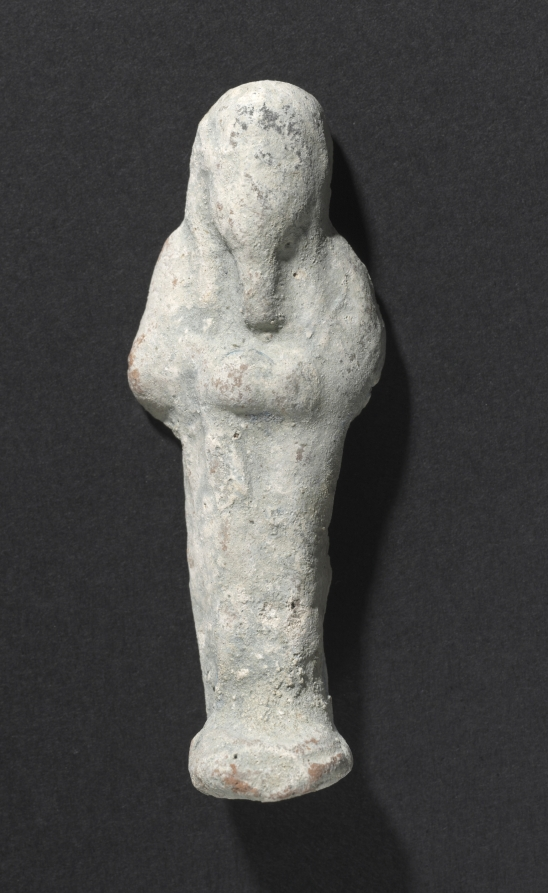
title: Shawabty of Ditamenpaankh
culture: Egypt, Late period (715–332 BCE), Dynasty 25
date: 715–656 BCE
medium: terracotta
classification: Funerary Equipment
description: High demand for shawabtys in the Late Period, a time when as many as 400 or more shawabtys were placed in the tomb with the deceased, gave rise to a specialized container for storing them: the shawabty box. This example is inscribed for the lady of the house, Ditamenpaankh, and was probably one of a pair originally made for her. The single-masted boat on the box's lid is perhaps an allusion to the pilgrimage of the deceased to the holy city of Abydos, the cult city of Osiris, king of the dead. The shawabtys inside are crude, mass-produced examples cast in an open mold. Made of terracotta, their blue paint imitates more costly shawabtys made of faience. As for the shawabty spell, it has been removed from its traditional location on the shawabty's front and relocated onto the sides of box, where it needed only to be written once, thus expediting production.